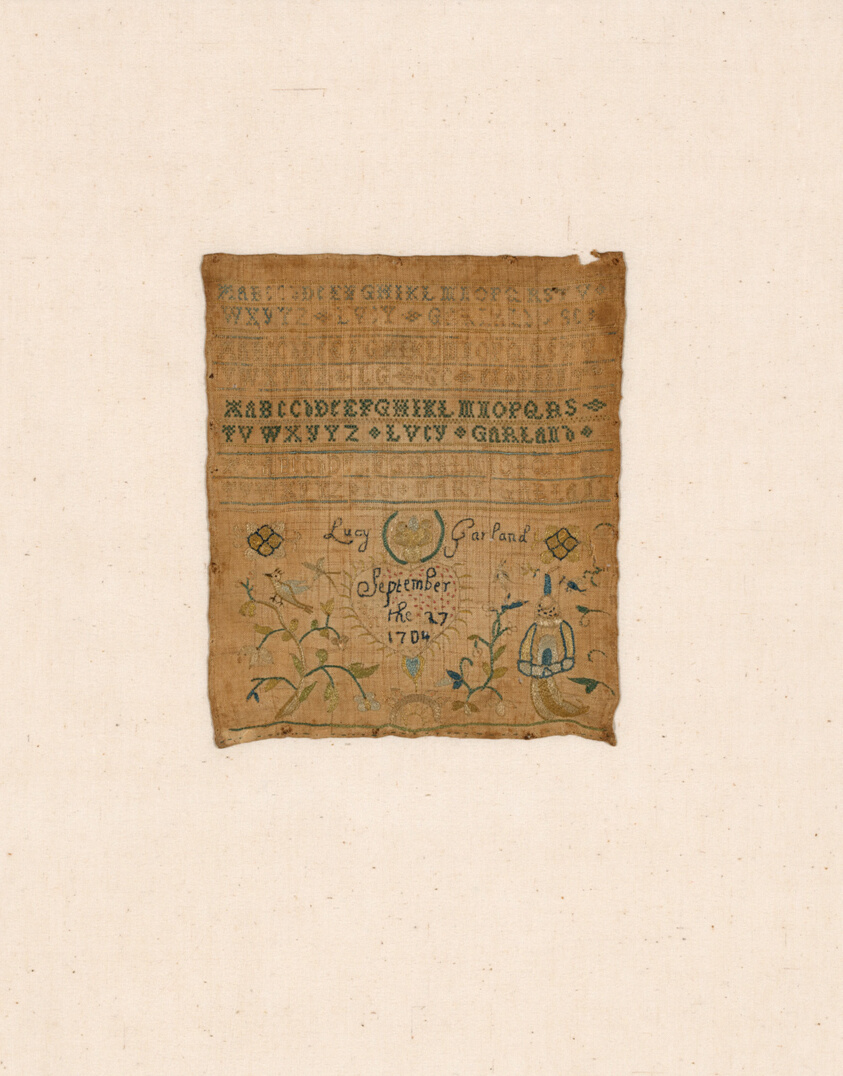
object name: Textile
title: Sampler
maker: Lucy Garland (American, active c. 1704); United States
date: 1704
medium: Linen, plain weave; embroidered with silk floss and yarns in Algerian eye, buttonhole, chain, half cross, individual back, marking cross, two-sided cross and trammed cross stitches; laid work, couching and French knots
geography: United States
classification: textile; needlework (visual works); sampler